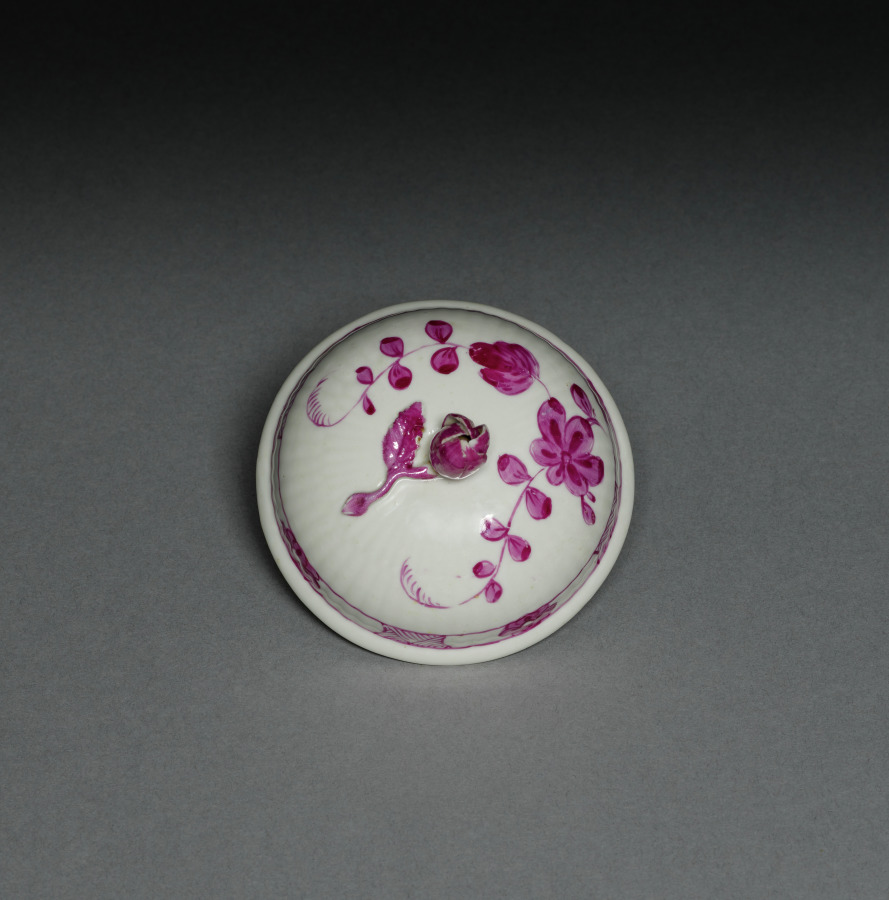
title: Chocolate Pot (lid)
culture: Germany, Berlin, late 18th century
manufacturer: Royal Porcelain Manufactory, Berlin (German)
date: late 1700s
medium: porcelain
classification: Ceramic